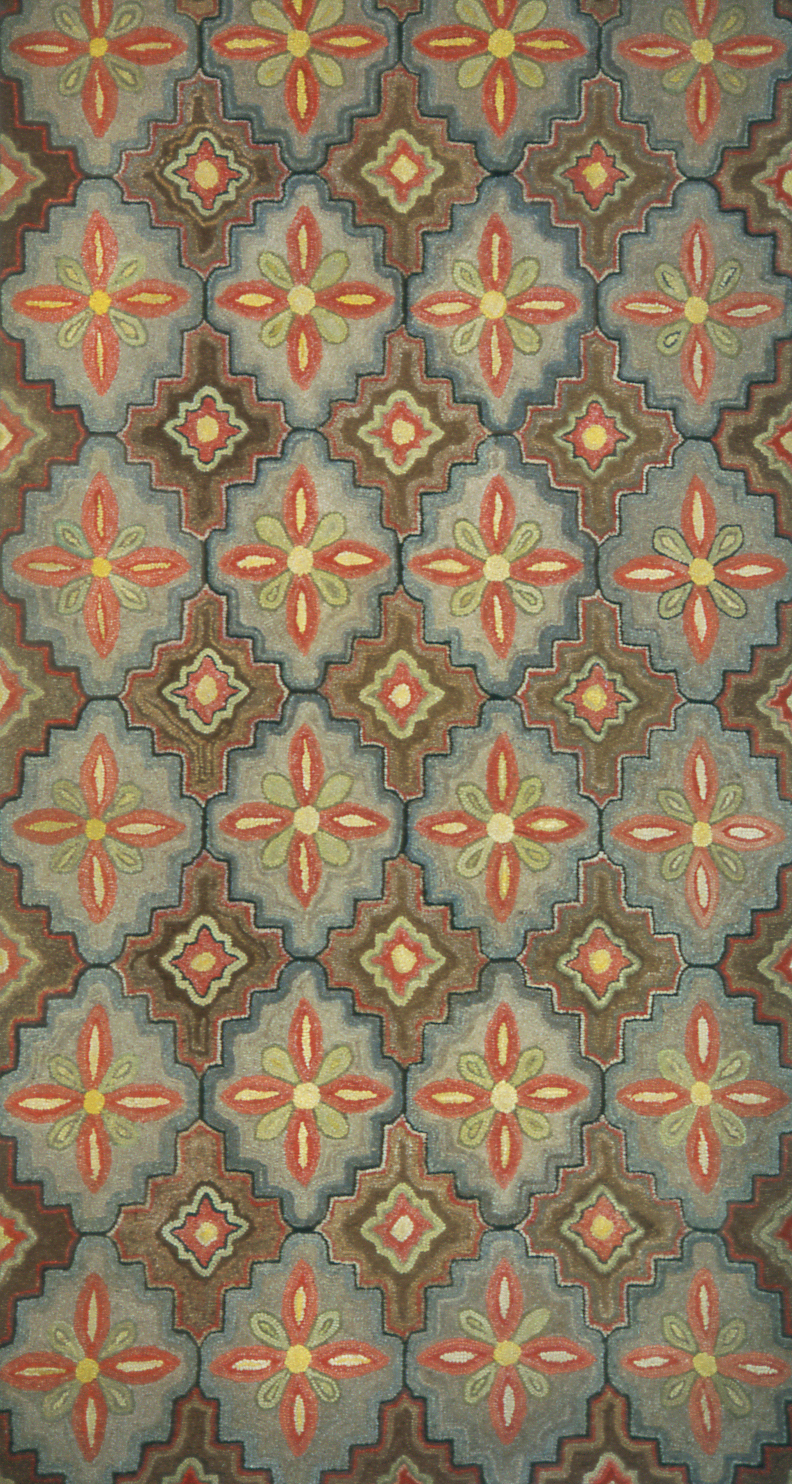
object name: Textile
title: Rug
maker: United States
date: 19th century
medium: Jute, plain weave with cotton and wool yarn and woven strips forming "hooked" pile; edged with wool, twill weave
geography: United States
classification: textile; needlework - rug